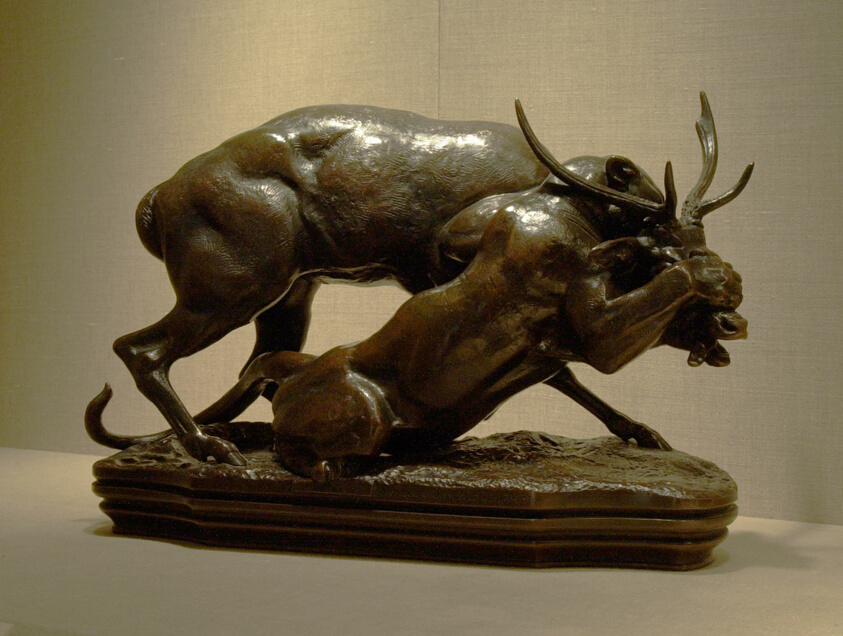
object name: Sculpture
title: Panther Seizing a Stag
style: nineteenth century, 19th century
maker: Antoine Louis Barye (French, 1795–1875)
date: Modeled c. 1833, cast 1889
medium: Bronze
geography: France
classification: statuette; french; bronze; sculpture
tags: animals, violence, hunting